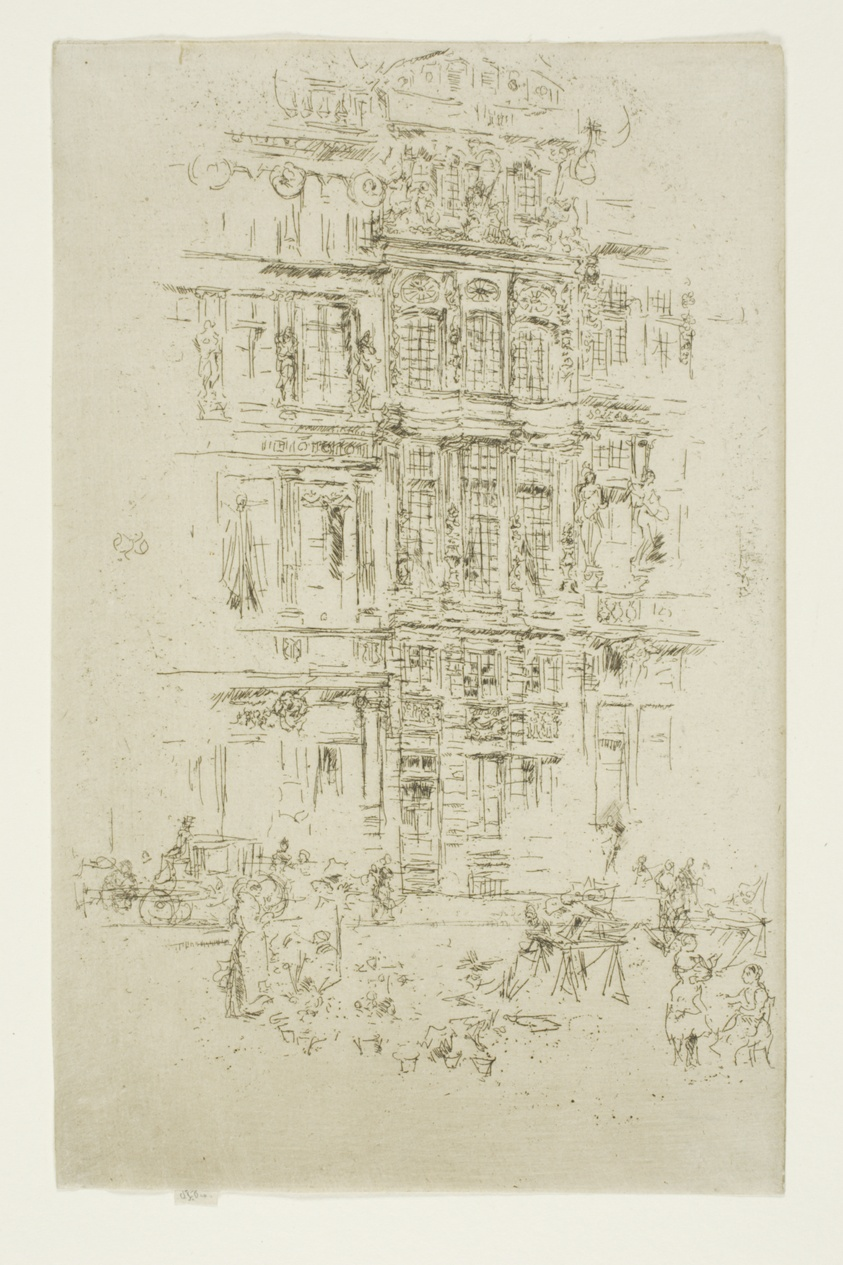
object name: Print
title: Palaces, Brussels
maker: James McNeill Whistler (American, 1834-1903)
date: 1887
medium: Etching and drypoint with foul biting in black ink on cream laid paper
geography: United States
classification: etching; drypoint; print; prints and drawing; foul biting; paper